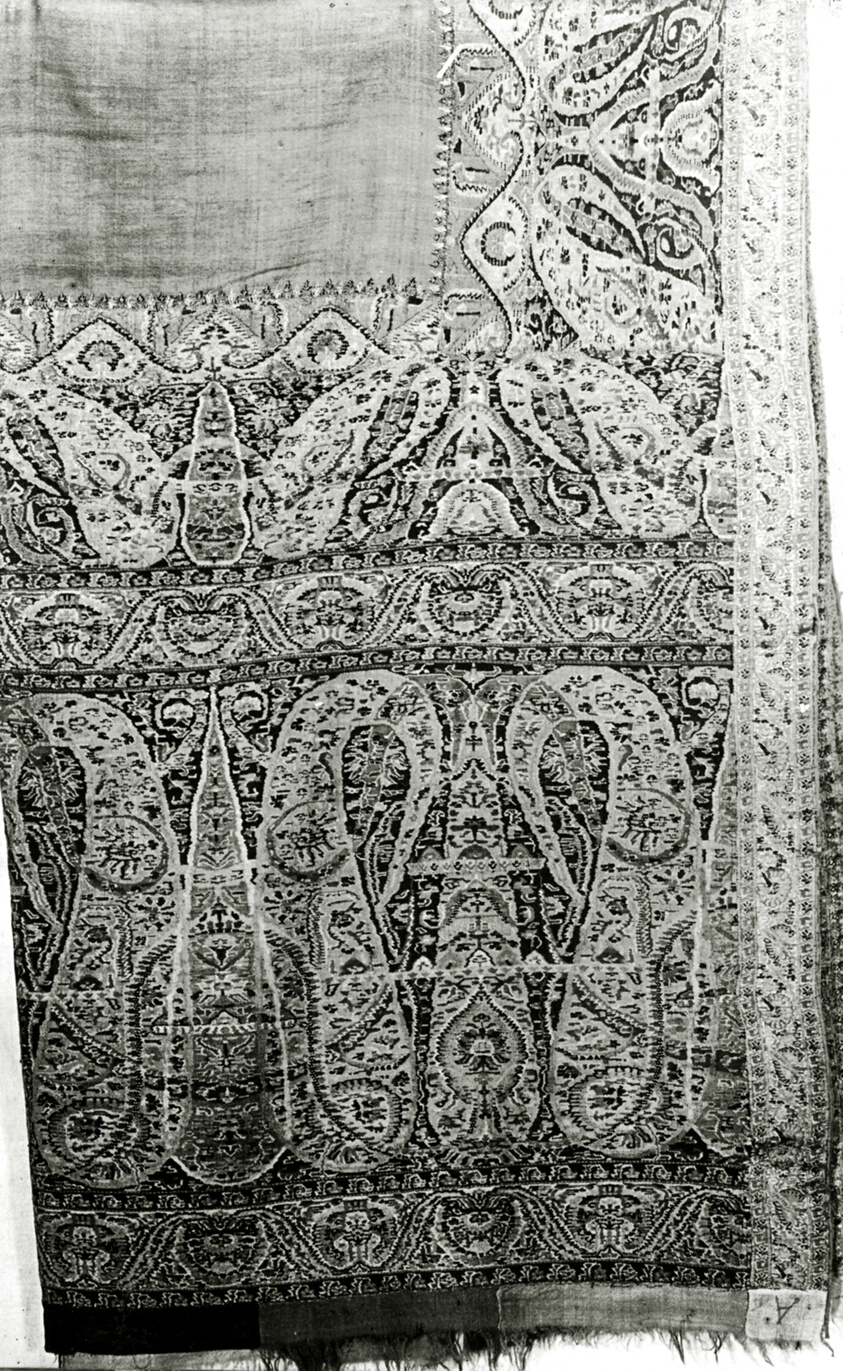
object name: Costume and Accessories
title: Shawl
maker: Eastern India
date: c. 1835/40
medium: Green cashmere center with wide multicolor borders at the ends and narrower ones at the sides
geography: India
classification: textile; weaving; costume; dress (garment); clothing